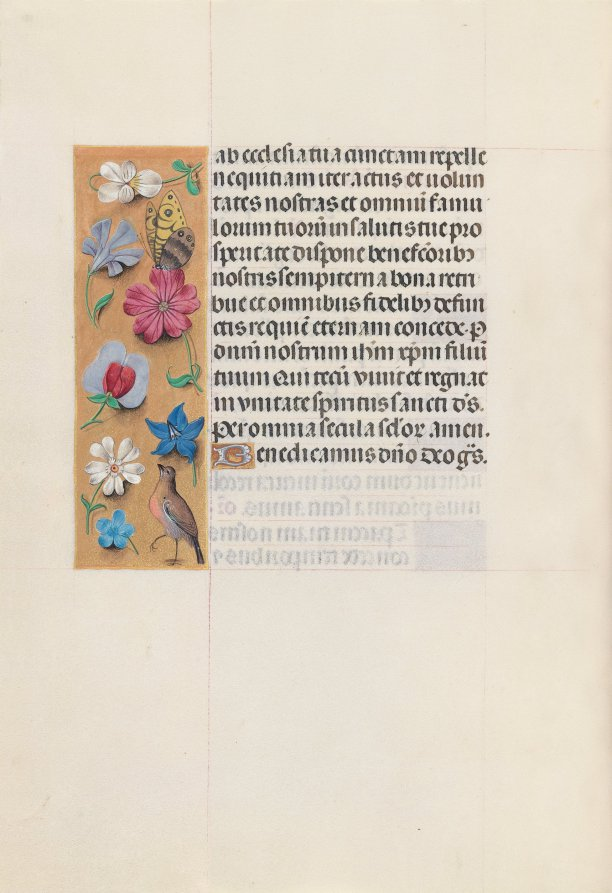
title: Hours of Queen Isabella the Catholic, Queen of Spain: Fol. 158v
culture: Flanders, Ghent and Bruges, late 15th century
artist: Master of the First Prayerbook of Maximillian (Flemish, c. 1444–1519)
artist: and Associates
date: c. 1500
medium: ink, tempera, and gold on vellum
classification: Bound Volume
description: This manuscript was illuminated by a circle of at least five highly organized manuscript painters active in the Flemish cities of Ghent and Bruges. The principal illuminator was Alexander Bening, who painted the majority of the book's miniatures. Manuscripts produced by this circle of artists are renowned for the decoration of their borders, which typically feature a rich variety of realistically-painted flowers, birds, and butterflies. This prayer book, called a book of hours, was intended not for a cleric, but for the private devotions of a lay person-in this case, Isabella the Catholic, Queen of Spain (1451-1504). Isabella's coat of arms embellishes the book's frontispiece. It is unlikely that the book was commissioned by the Queen herself; rather, she probably received it as a diplomatic gift from someone courting her patronage, perhaps Cardinal Francisco Jimenez de Cisneros. A Franciscan friar, Jimenez was dependent upon Isabella for his advancement, first to the post of Queen's confessor in 1492, and then to Archbishop of Toledo in 1495.